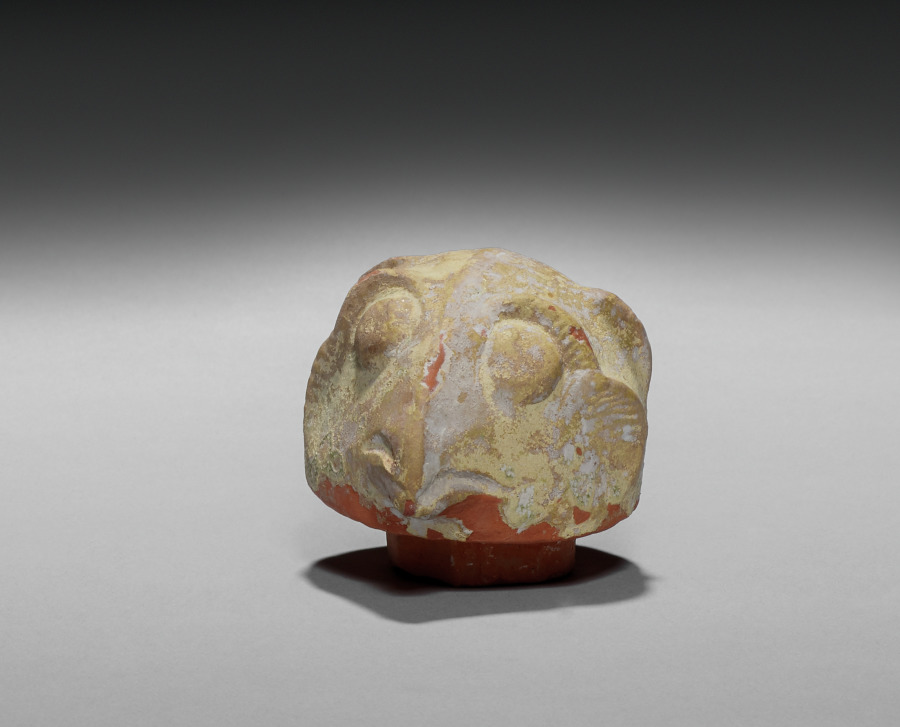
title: Owl-shaped Jar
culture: China, Henan province, Western Han dynasty (206 BCE–8 CE)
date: 206 BCE–9 CE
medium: Amber-brown glazed low-fired pottery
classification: Ceramic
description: Pottery vessels in the shape of owls were made since Neolithic times and throughout the Bronze age. These jars in the form of vigilant owls may have provided a tomb occupant with grain in the afterlife. However, the meaning of these mysterious birds and the association of the owl motif with burial sites in China is not fully understood.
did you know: The jar cover is modeled in the shape of an owl's head.